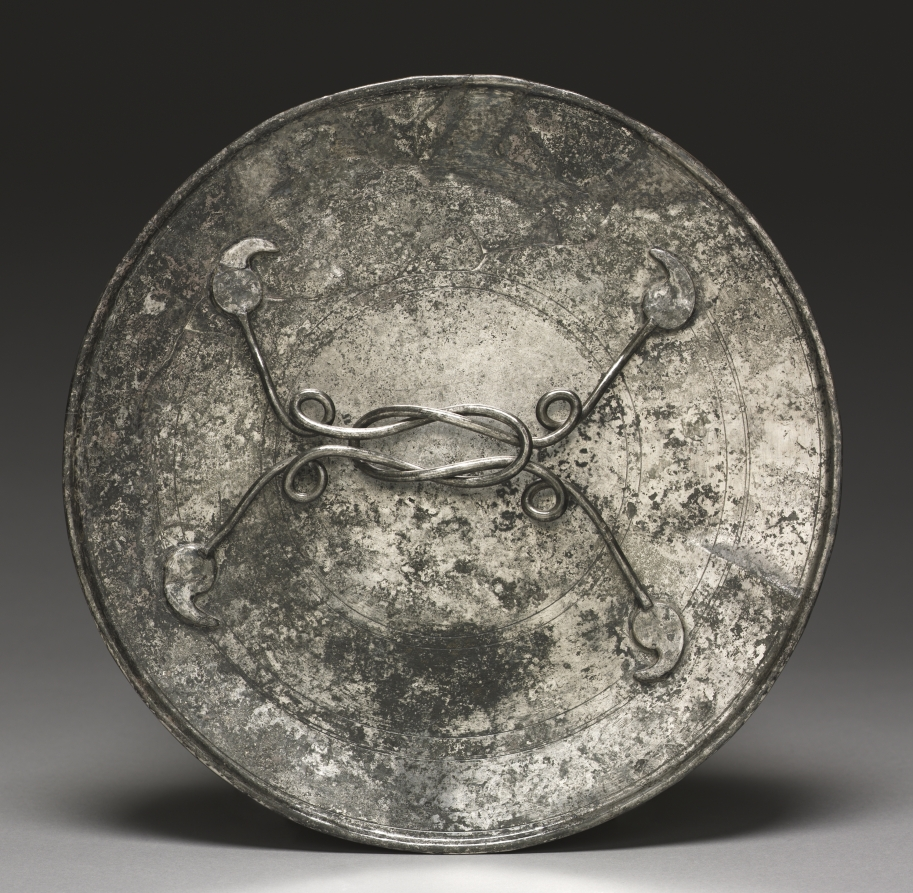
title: Mirror with a Handle in the Form of a Herakles Knot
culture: Byzantium, Syria(?), Byzantine period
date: c. 280–400 CE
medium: silver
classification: Metalwork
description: This type of mirror was introduced throughout the Roman Empire by the 2nd century and remained popular into the 3rd and 4th centuries. Similar examples have been found in Germany and Britain. The handle is made of two thick pieces of silver wire, intertwined to form a Herakles knot--a knot so complex that only someone as strong as Herakles could break it. In antiquity, knots of various kinds were believed to provide protection from harm.